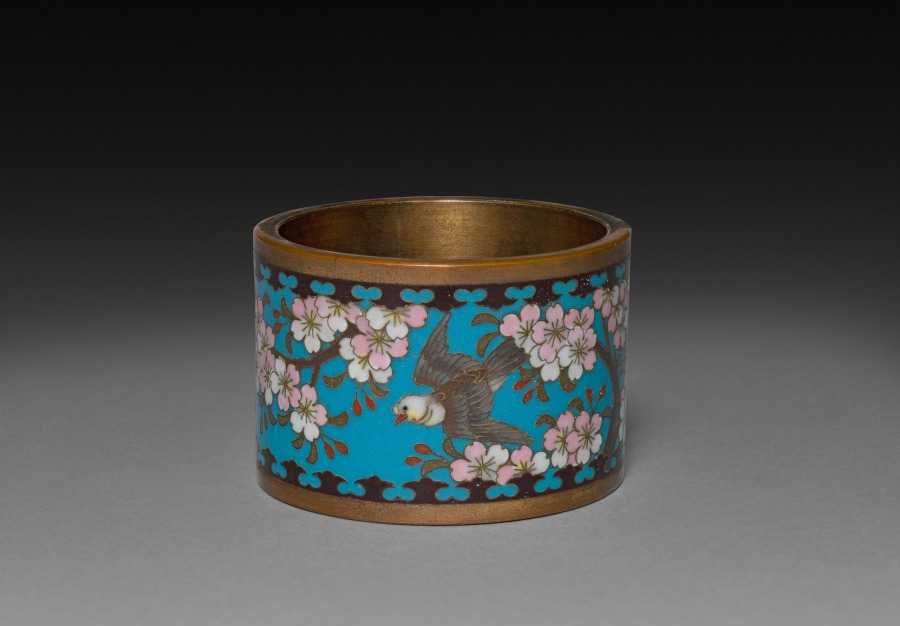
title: Napkin Ring with Cherry and Birds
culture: Japan, Meiji period (1868–1912) or Taishō period (1912–26)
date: early 1900s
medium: cloisonne enamel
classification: Enamel